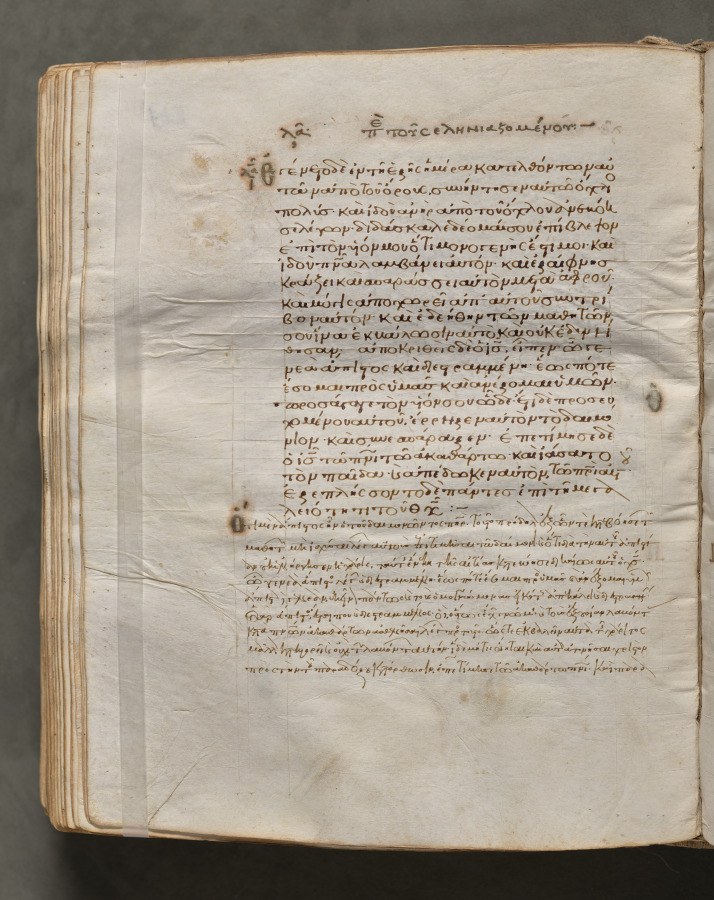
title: Text, folio 249 (verso), from a Gospel Book with Commentaries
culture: Byzantium, Constantinople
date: c. 1000–1100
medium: ink, tempera, and gold on vellum; leather binding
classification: Bound Volume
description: Each of the four gospels in this book opens on a page with brilliantly illuminated borders depicting the author of the text as well as birds—principally peacocks, symbols of the immortality of the soul—and fountains, representing the fountain of life and the salvation of the soul. This volume consists of 428 leaves with texts in Greek. Its level of sophistication suggests that it was probably written and decorated in a monastery in Constantinople.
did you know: Gospel books were carried in procession through Byzantine churches.